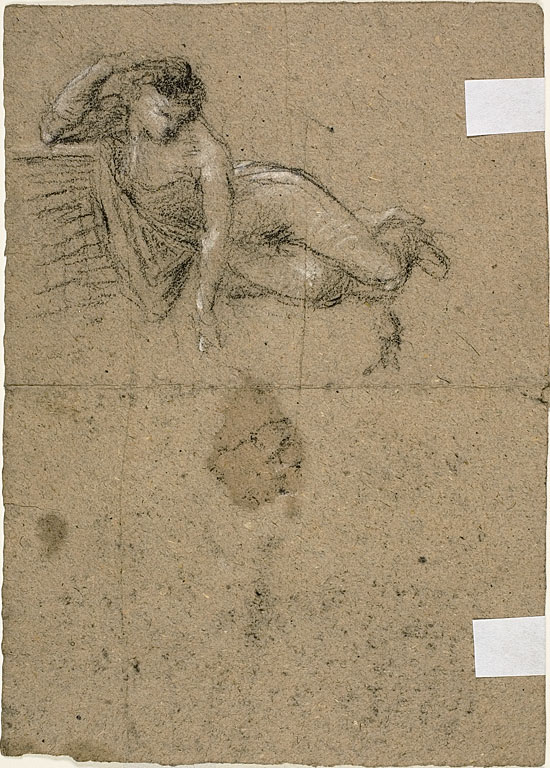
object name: Drawing and Watercolor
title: Sketches: Seated Man with Head in Hands and Two Figures Bending Toward Others in Background (recto); Reclining Woman (verso)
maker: Jean Baptiste Carpeaux (French, 1827-1875)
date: 1847/75 (recto); 1863/64 (verso)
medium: Black and white chalk (recto and verso) on tan wove paper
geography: France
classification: chalk; drawings (visual works); prints and drawing